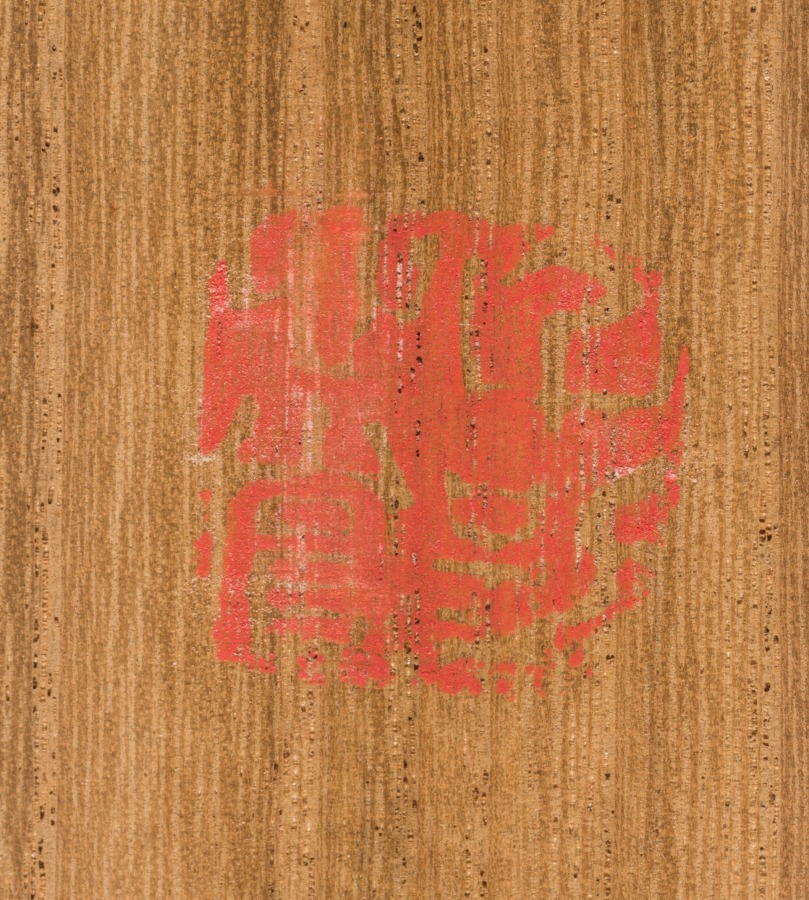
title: Lake Suwa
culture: Japan, Edo period (1615–1868)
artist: Utagawa Hiroshige (Japanese, 1797–1858)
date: c. 1832–58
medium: hanging scroll; ink and color on silk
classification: Painting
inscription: 立斎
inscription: 廣重